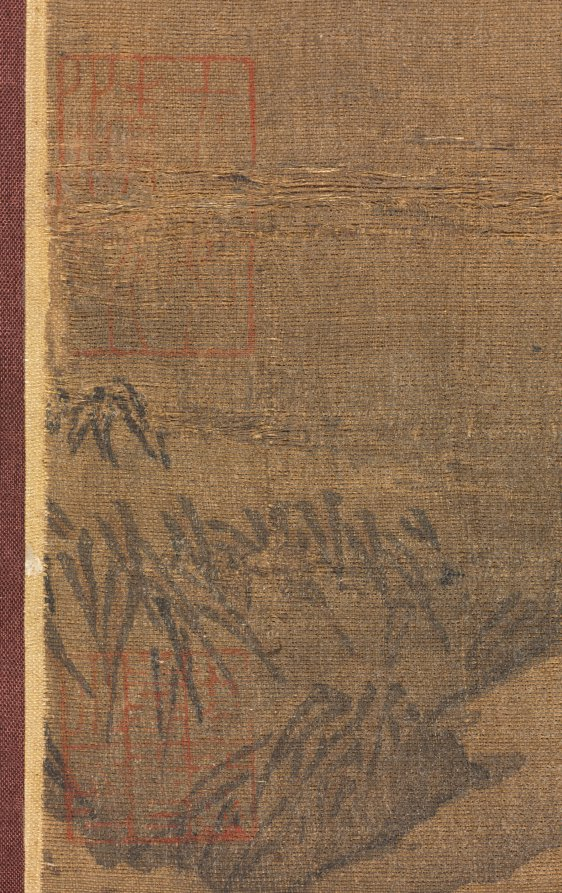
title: Birds in a Grove in a Mountainous Winter Landscape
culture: China, Jin dynasty (1115-1234)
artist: possibly by Gao Tao (Chinese, 1100s)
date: 1100s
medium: hanging scroll; ink and slight color on silk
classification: Painting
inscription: A signature and a seal at lower left edge: Gao Tao 高燾; seal undecipherable. 10 additional seals: 1 of Zhu Gang 朱棡 [1358–1398]; 3 of Suo’etu 索額圖 [1636–1703]; 2 of A’erxipu 阿爾喜普 [1700s]; 1 of Weng Fanggang 翁方綱 [1733–1818]; 3 unidentified.